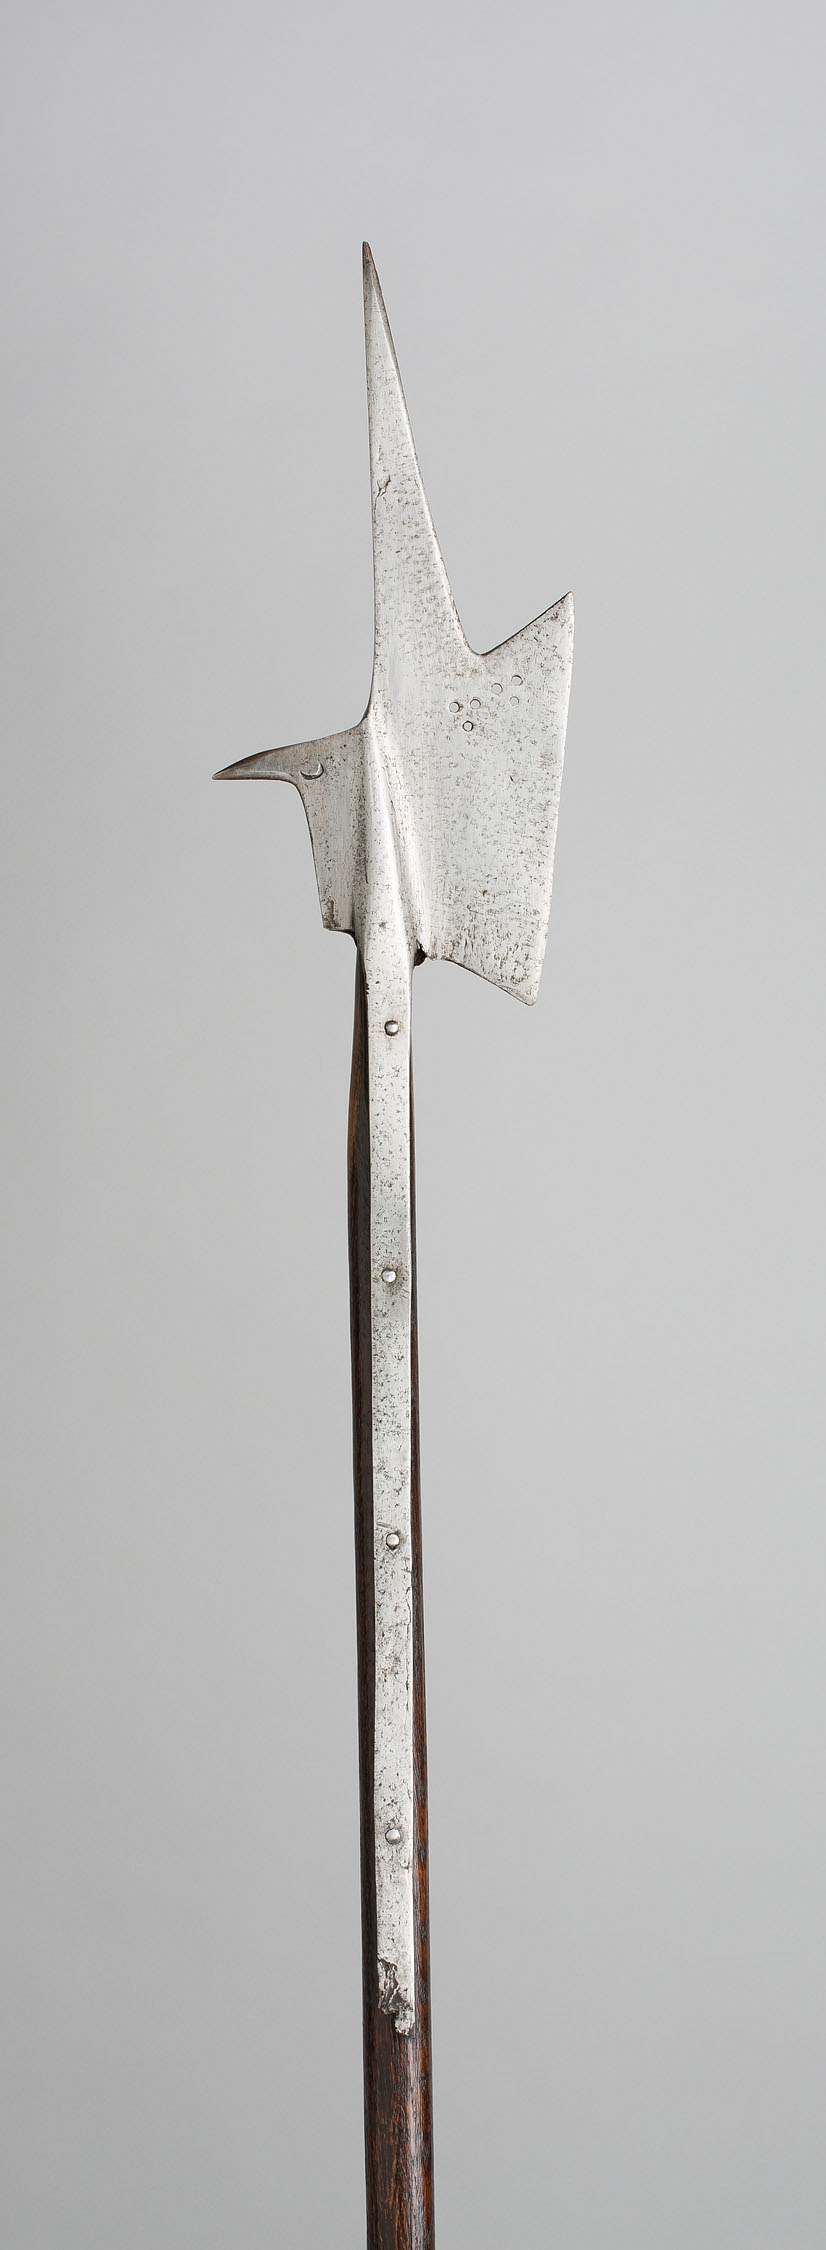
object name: Arms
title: Halberd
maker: German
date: c. 1500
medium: Steel and wood (oak)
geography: Germany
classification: edged weapon-staff; arms; arms and armor